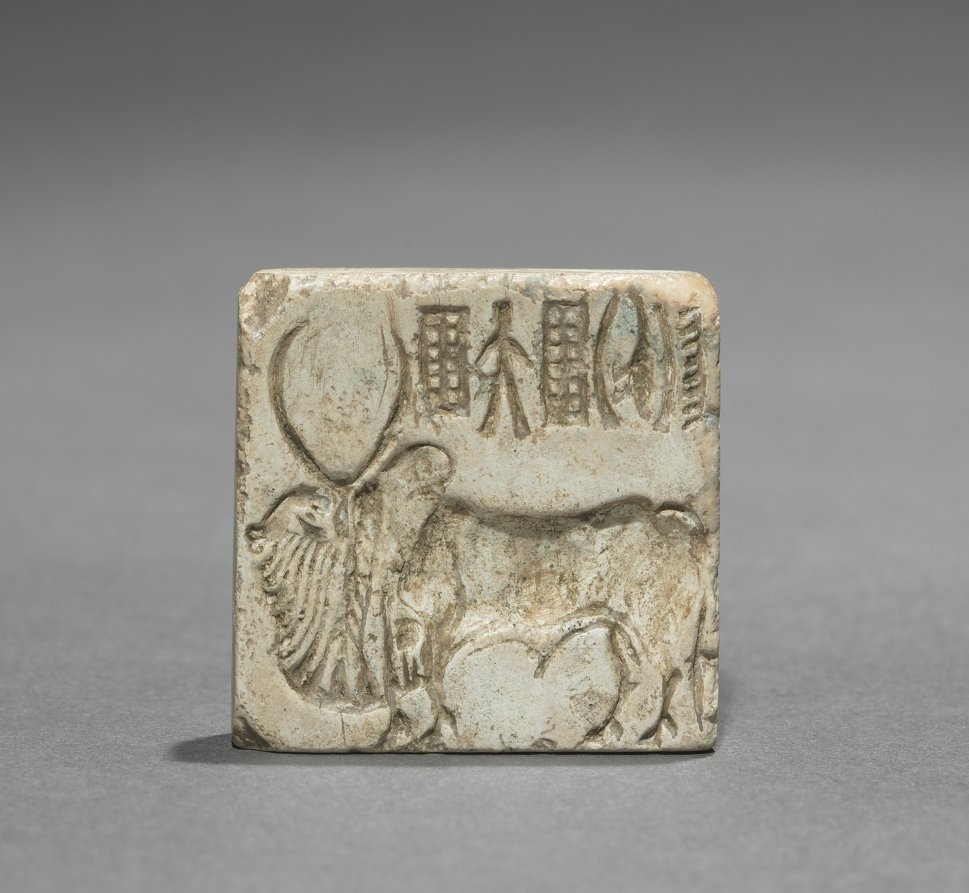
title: Seal with Two-Horned Bull and Inscription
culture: Pakistan, Indus Valley civilization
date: c. 2000 BCE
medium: steatite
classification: Seals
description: Small stone seals, probably used to identify merchandise or property, are among the most numerous objects discovered from the mysterious proto-historic sites along the banks of the Indus River system. Like these, most have sensitively rendered animal imagery along with an inscription written in a script that has not yet been deciphered.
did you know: A perforated boss at the back allowed the seal to be suspended and easily pressed.